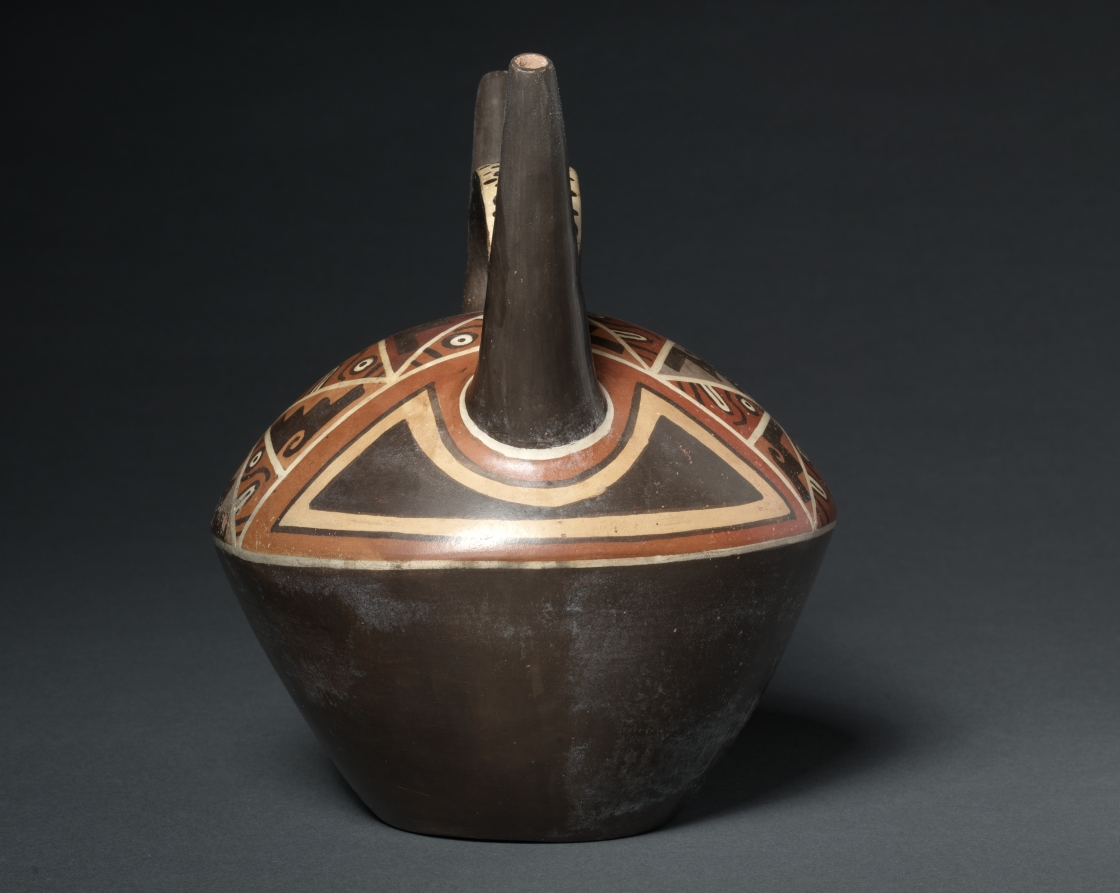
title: Double-Spouted Vessel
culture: Peru, Wari style, 6th-10th century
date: 500–900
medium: ceramic, slip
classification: Ceramic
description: This vessel was created during the time of the Wari culture, a superpower of the Andes mountains whose influence was felt in adjacent coastal areas, where this ceramic was made. Across the top of the vessel's chamber is a repeated design, a profile face and stepped fret, the meaning of which remains enigmatic. It also appears on Wari tapestry tunics, high-status garments worn by officials of the Wari state. The painting on the strap handle is quite unusual; it may represent stylized feline pelage.